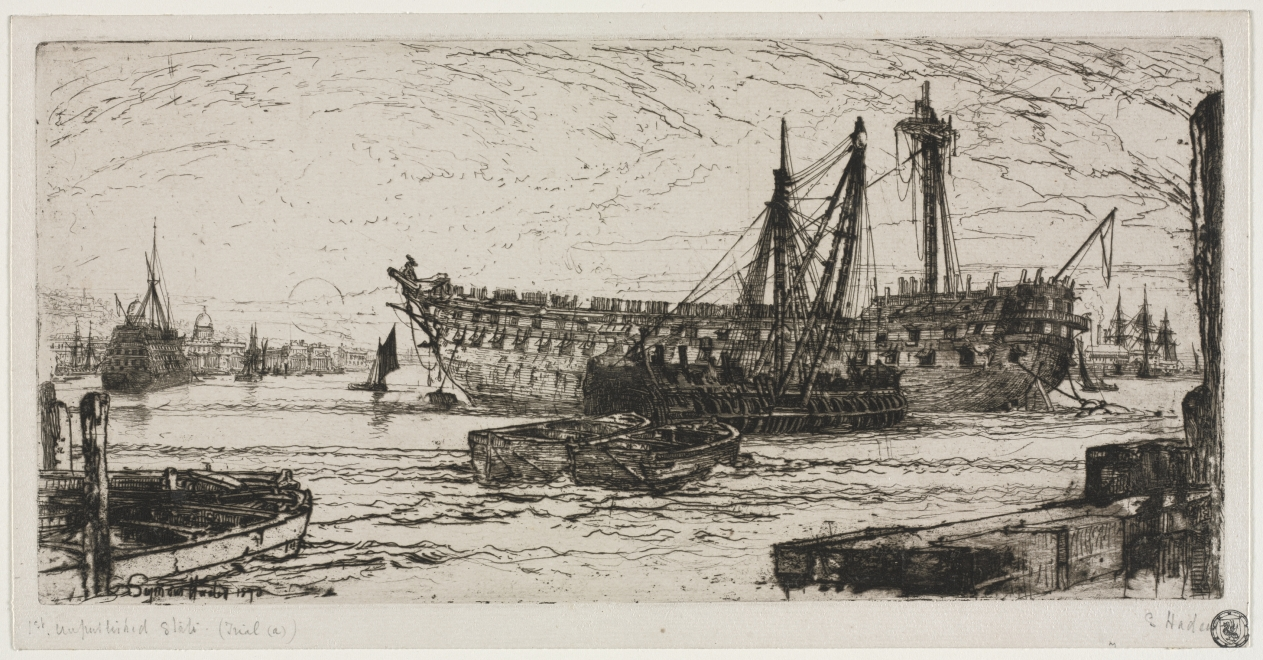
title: Breaking up of the Agamemnon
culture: England, 19th century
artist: Francis Seymour Haden (British, 1818–1910)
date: 1870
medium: etching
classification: Print